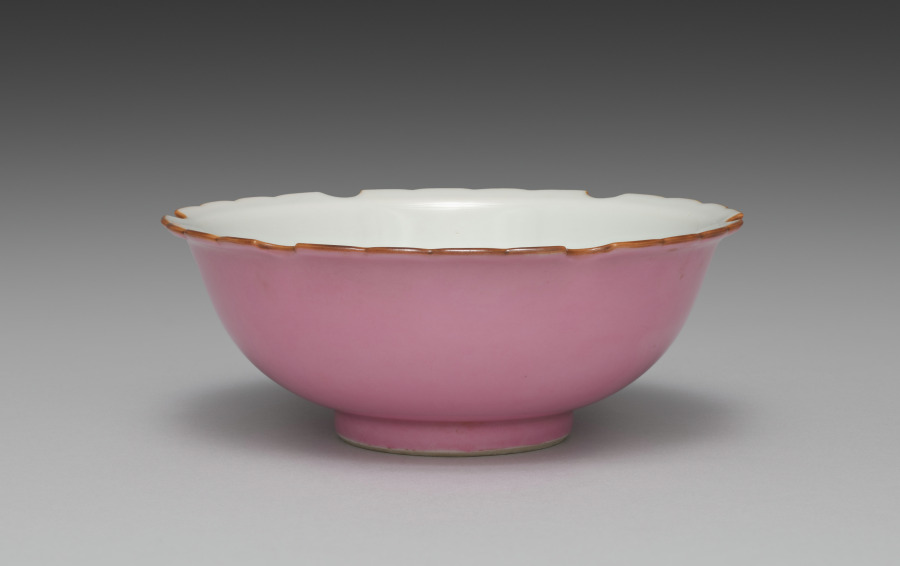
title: Dish from Snow-Flake Side Dishes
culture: Japan, Meiji period (1868–1912)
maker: Seifū Yohei III (Japanese, 1851–1914)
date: 1893–1914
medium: One from a set of six porcelain dishes; porcelain with lobed rims and pink glaze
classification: Ceramic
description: According to the box lid, this set of six side dishes, or mukōzuke, are “snow-flower style” (sekkashiki), having mouths shaped like snowflakes. Their mouths, which have six lobes and scalloped edges, are traced with brown iron oxide at the rim. The outside of each bowl is glazed with a very bright pink over the basin and foot, and the inside is left white. From directly above, one sees a snowflake-like shape, and from the side, they seem to float above a rosy ground.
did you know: The box for this set of dishes has an inscription on the side noting that they were for a person with the family name Nakamoto.